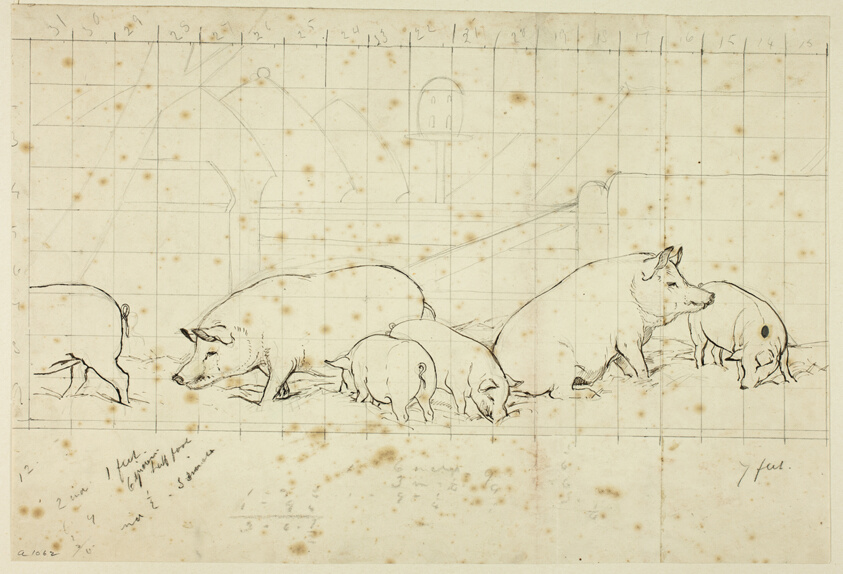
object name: Drawing and Watercolor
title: Pigs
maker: Henry Stacy Marks (English, 1829-1898)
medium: Pen and brown ink, over graphite, squared in graphite, on ivory wove paper (pieced together)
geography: England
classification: pen and ink drawings; drawings (visual works); prints and drawing